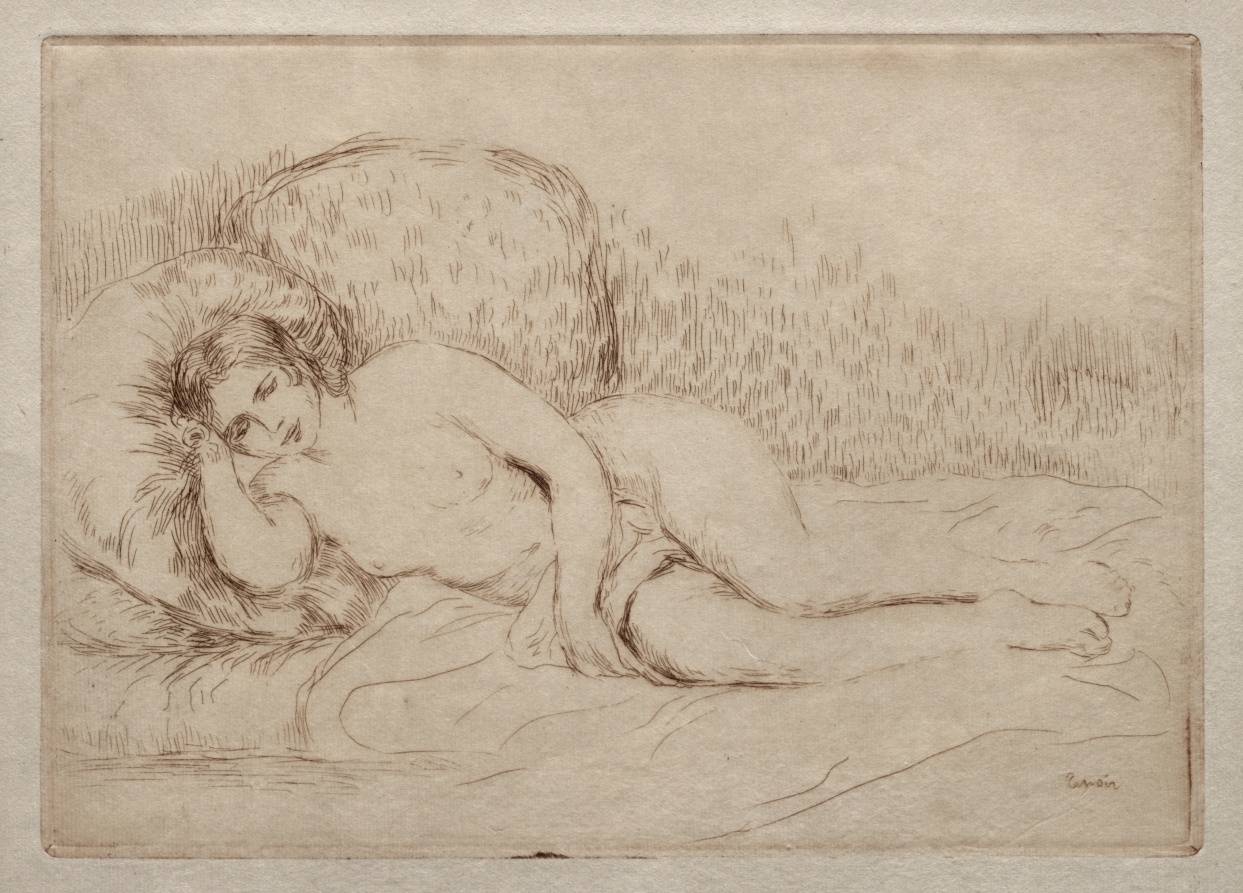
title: Femme nue couchée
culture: France, late 19th-early 20th Century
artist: Pierre-Auguste Renoir (French, 1841–1919)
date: 1906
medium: etching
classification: Print